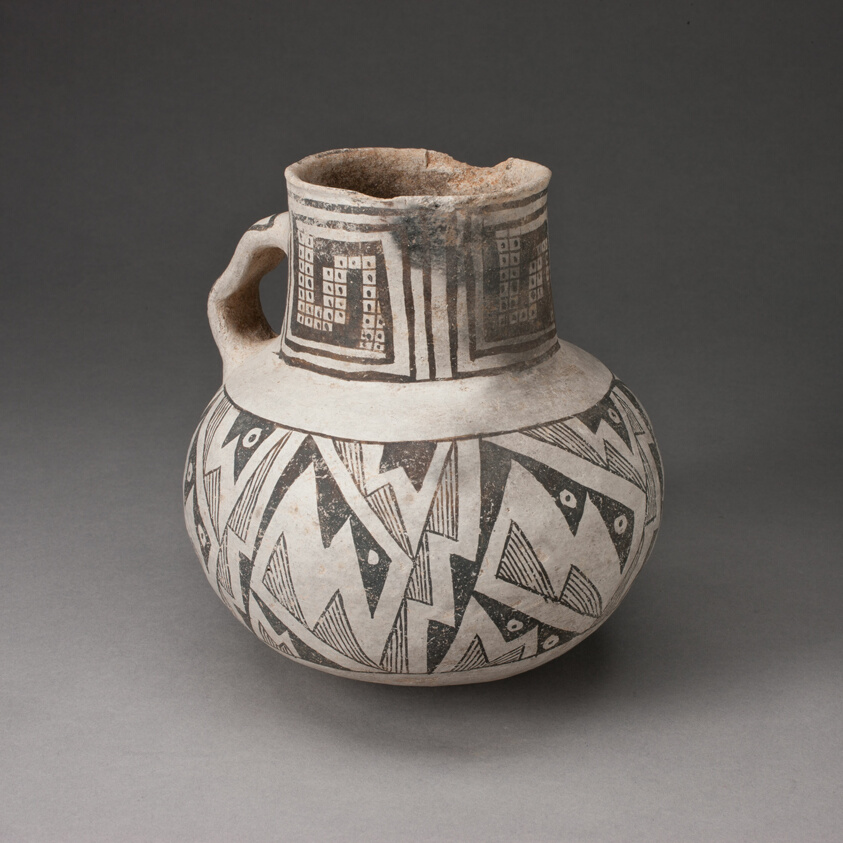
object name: Vessel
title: Pitcher with Interlocking Zigzag Motifs and Checkerboard Pattern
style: ancestral pueblo (anasazi), anasazi, Pre-Columbian, americas, southwest, pueblo, Arts of the Americas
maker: Ancestral Pueblo (Anasazi), Kayenta Black-on-white; Kayenta area, north-east Arizona, United States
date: 950–1400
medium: Ceramic and pigment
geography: Arizona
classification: earthenware; ceramics; vessel; art of the americas